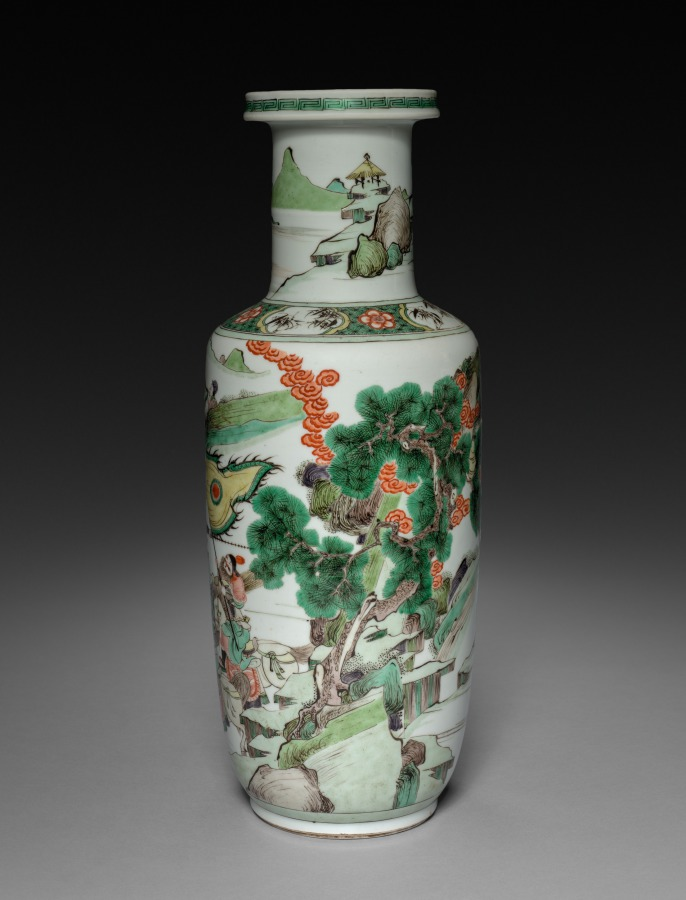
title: Vase with Decoration of Horsemen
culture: China, Qing dynasty (1644-1911), Kangxi reign (1662-1722)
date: 1622–1722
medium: porcelain with famille verte overglaze enamel decoration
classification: Ceramic